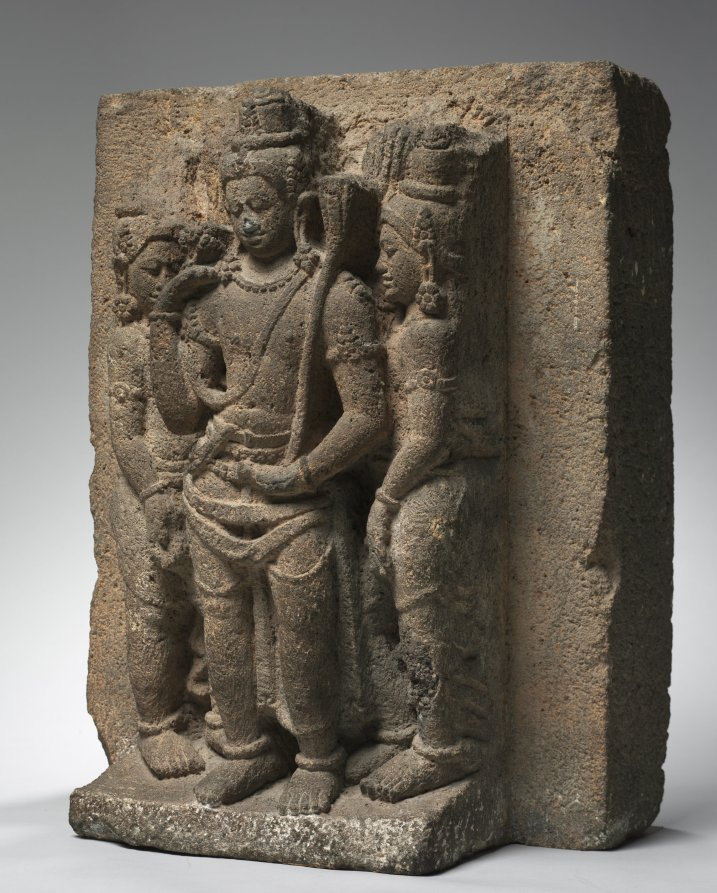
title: Triad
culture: Indonesia, Central Java, Prambanam, Temple of Loro Jonggrang, early 10th Century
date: early 900s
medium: volcanic stone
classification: Sculpture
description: This group has been linked to a temple dedicated to Shiva in Central Java. Its name, Loro Jonggrang, meaning "Slender Maiden," refers to the image of the warrior goddess Durga on the temple, which local legend links to the form of a princess cursed to be turned into stone. The highly porous stone is the distinctive material used to construct temples on the volcanic islands of Indonesia.